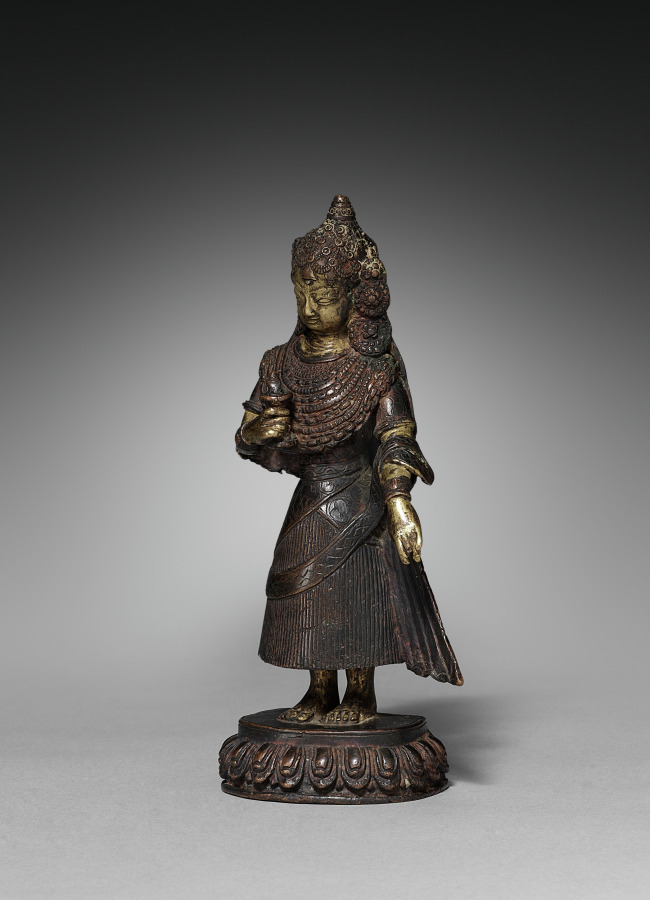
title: Royal Female Donor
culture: Nepal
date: c. 1500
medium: bronze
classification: Sculpture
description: Carrying a lamp in one hand, this female figure draped in finery was probably included as the donor of a sculptural group. She wears a complex headdress consisting of a network of beads and plaques joined together, ending in a bell at her forehead and crowning a long cloth that reaches to her waist. Her position on a lotus flower may indicate the transcendent state she attained as a result of the karmic merit of her donation.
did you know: The pleated skirt tied with a scarf around her waist is characteristic of Nepal.